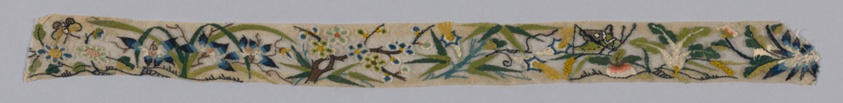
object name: Textile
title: Trimming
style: qing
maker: Han-Chinese (China)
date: Qing dynasty(1644–1911), 1850/1900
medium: White gauze, embroidered strips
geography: China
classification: weaving; textile